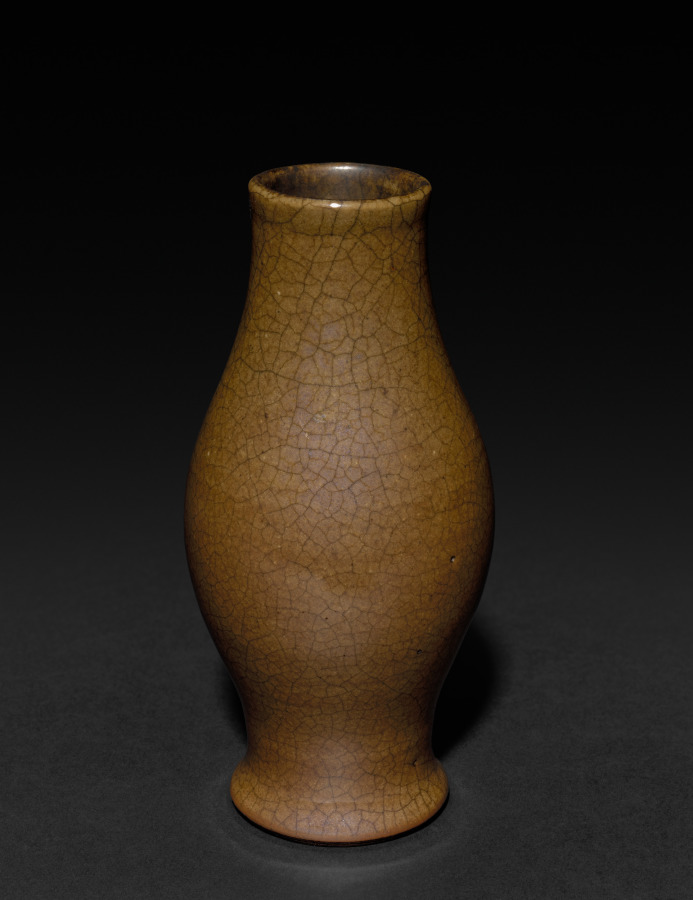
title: Vase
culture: China, Qing dynasty (1644-1911), Kangxi reign (1661-1722)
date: 1662–1722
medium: porcelain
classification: Ceramic